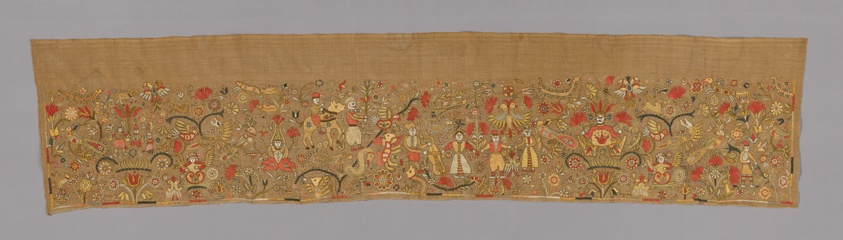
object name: Textile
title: Incomplete Valance (For the Bed)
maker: Greece, Crete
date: 19th century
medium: Cotton, plain weave; embroidered with silk in Armenian edge, back, buttonhole, Cretan, cross, encroaching satin, satin, single satin, split, and stem stitches; couching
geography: Kríti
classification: textile; needlework (visual works)